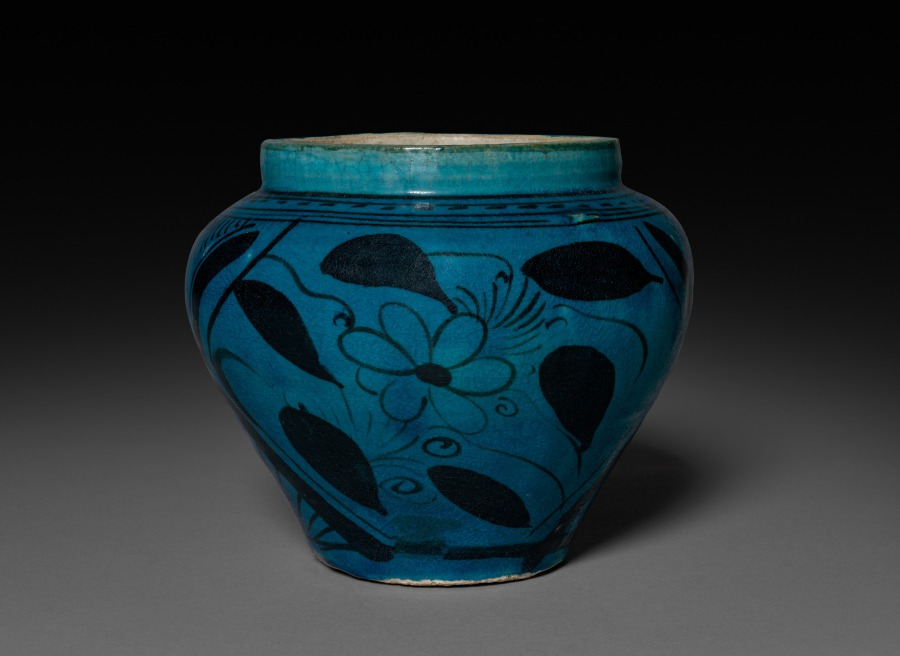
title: Jar: Cizhou ware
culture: China, Yuan dynasty (1271-1368)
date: 1271–1368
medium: stoneware with slip coating, turquoise glaze and painted underglaze decoration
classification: Ceramic